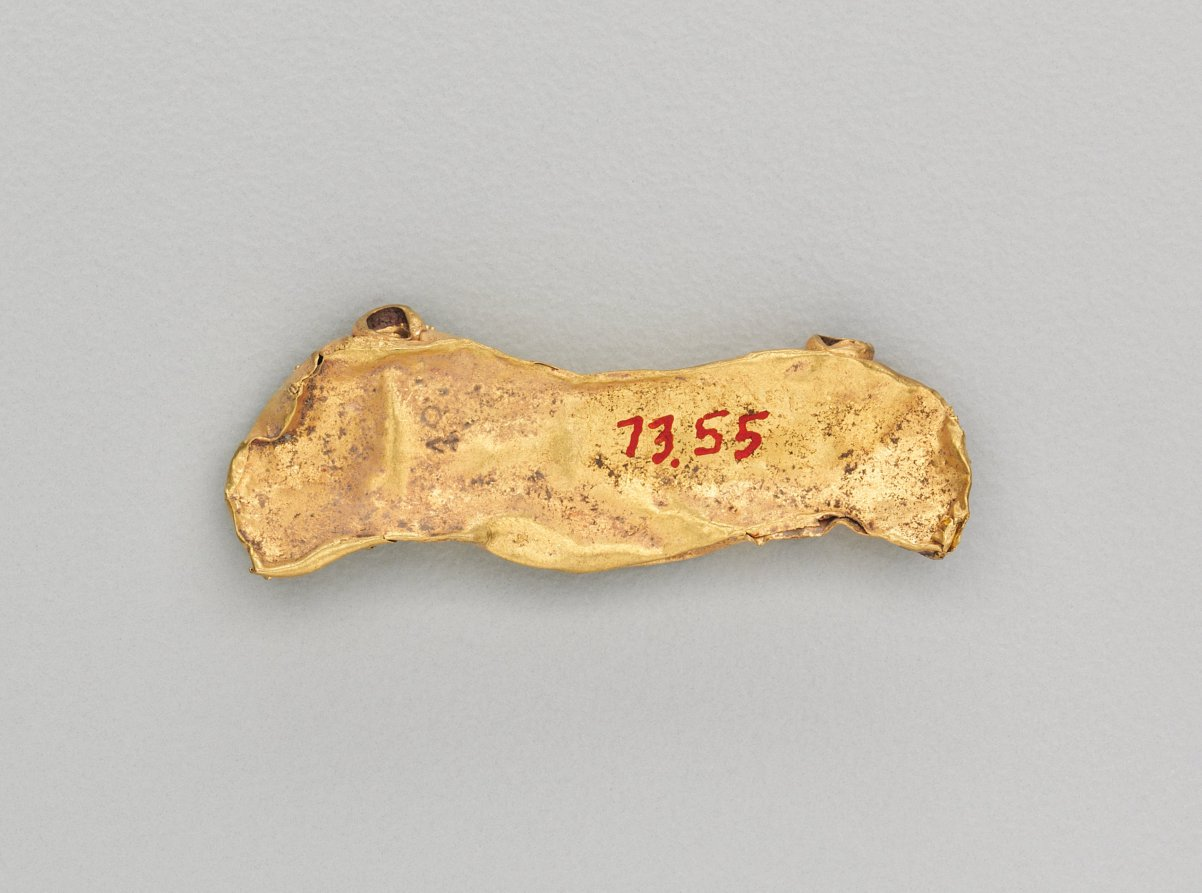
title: Set of Pendants Ending in a Bull's Head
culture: India, Shunga period (185–78 BCE)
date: 185–72 BCE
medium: gold repoussé with granulation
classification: Jewelry